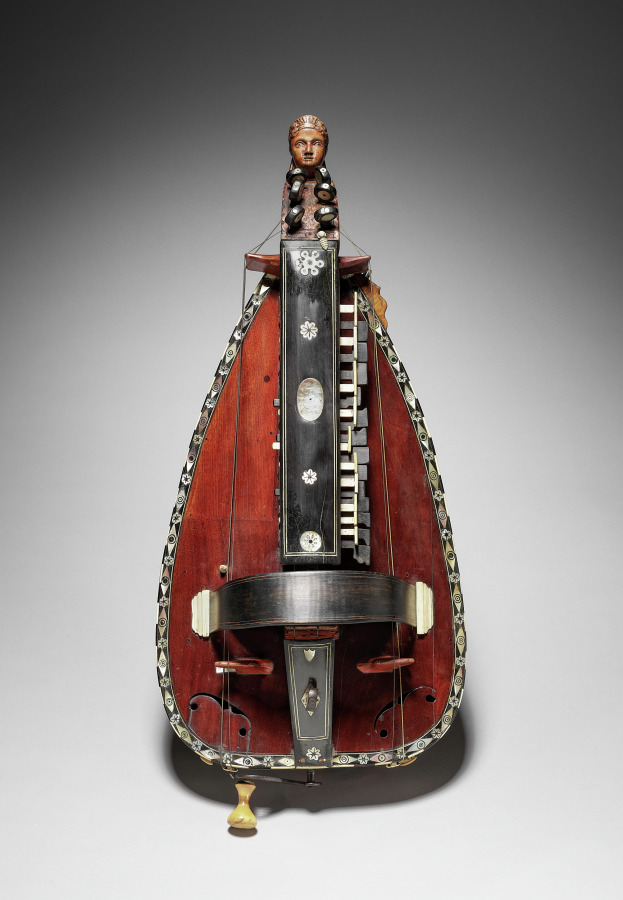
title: Vielle à roue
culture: France, 18th century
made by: Pajot of Jánzat (French)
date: 1700s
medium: wood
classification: Musical Instrument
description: The instrumentalist could play melodies on the keyboard that presses tangents against one or more strings. Often there are also multiple drone strings, which give a constant pitch accompaniment to the melody, resulting in a sound similar to that of bagpipes. This type of instrument is depicted in several artworks in the CMA collection: 1924.656, 2008.34.2, 1960.20. The vielle à roue is also related to the Swedish nyckelharpa, which was featured on the CMA performing arts series in 2017 played by Emilia Amper.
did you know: Also known as a “hurdy-gurdy” or “wheel fiddle,” this instrument produces sound by a hand crank-turned rosined wheel rubbing against the strings.